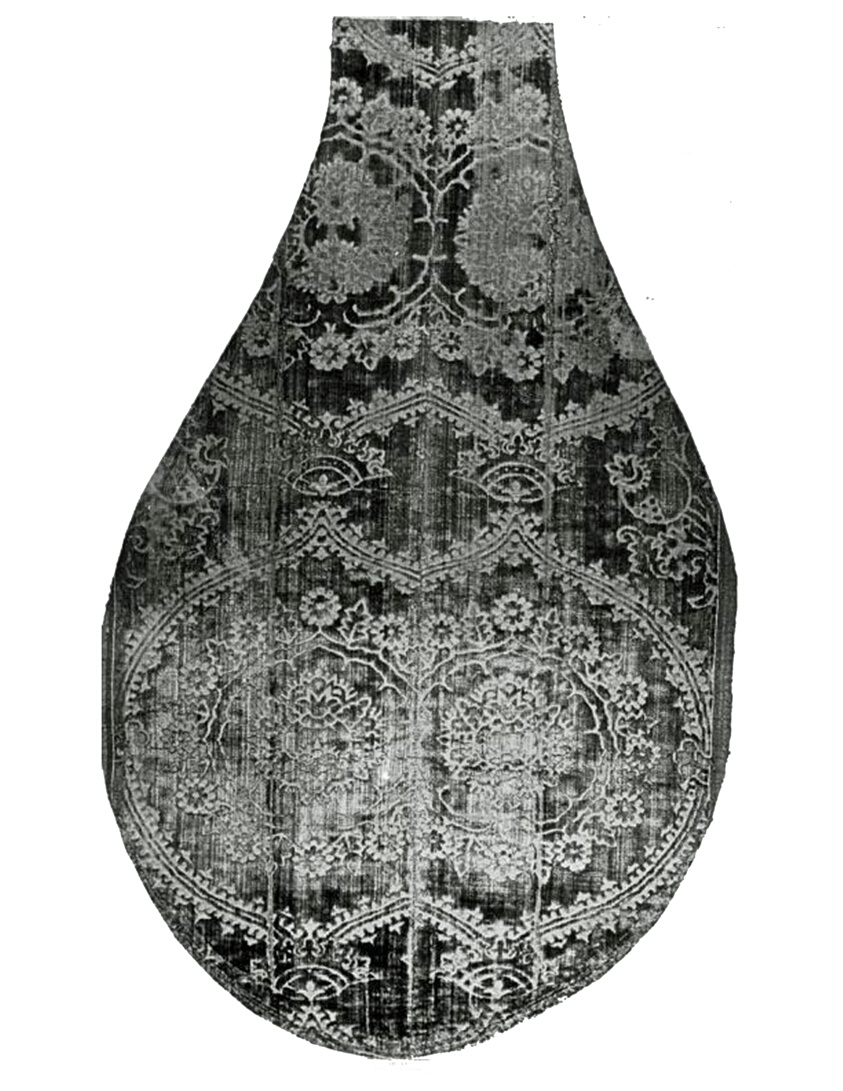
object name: Textile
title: Panel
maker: Italy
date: 15th century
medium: Silk, cut, and voided velvet against satin weave foundation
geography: Italy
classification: textile; weaving - velvet; weaving